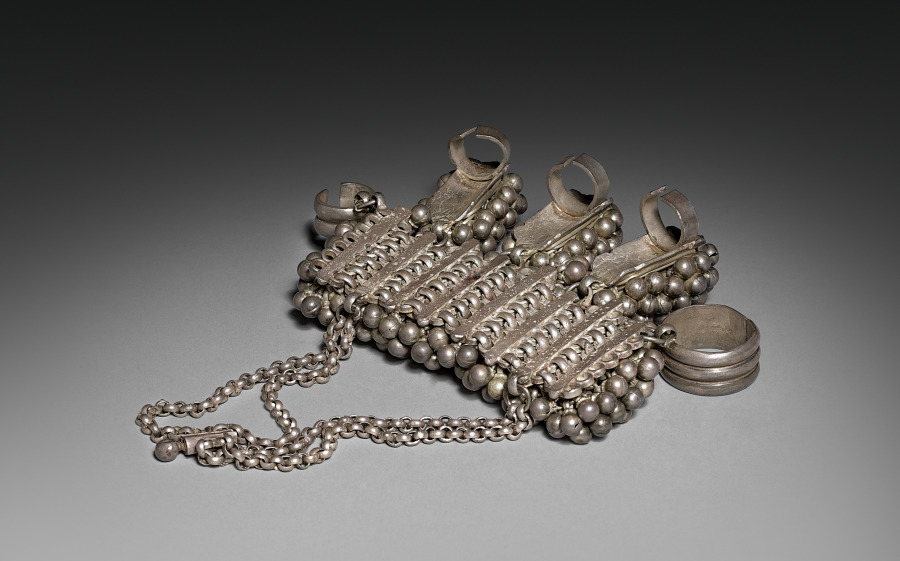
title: Toe Rings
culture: India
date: 1800s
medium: silver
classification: Jewelry